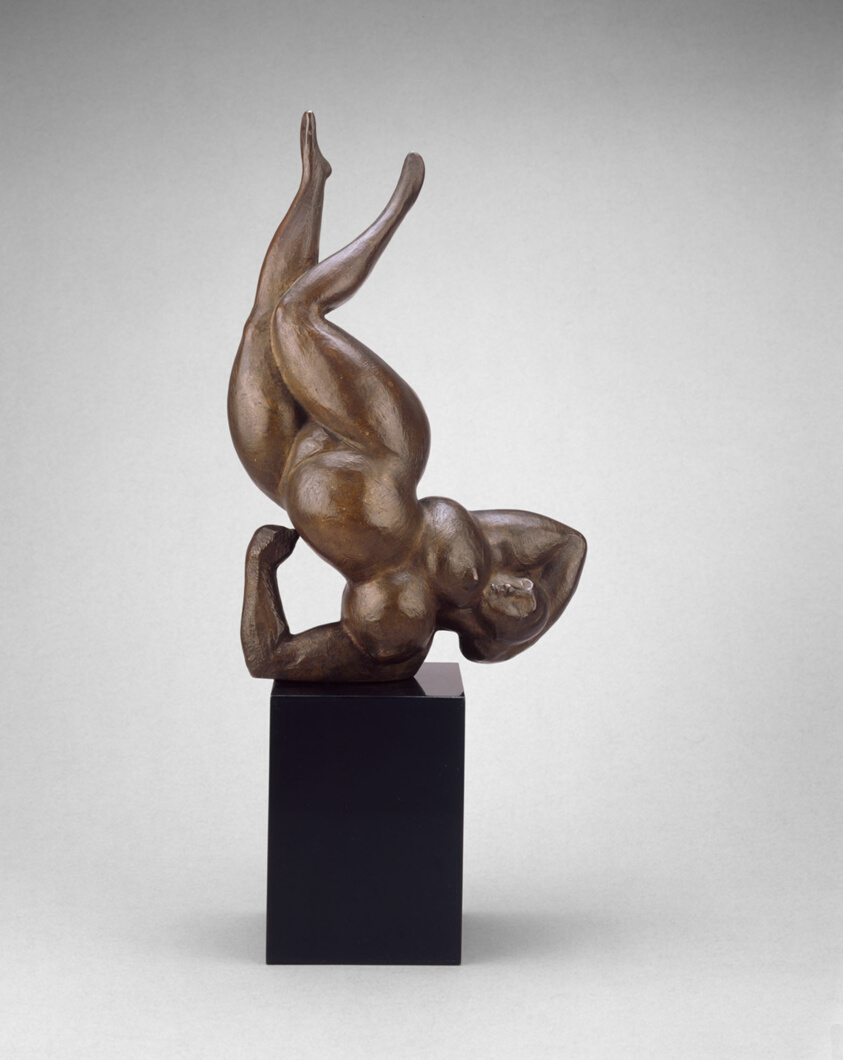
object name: Sculpture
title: "Acrobat" Upside Down Figure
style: Modernism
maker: Gaston Lachaise (American, born France, 1882–1935)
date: 1926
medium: Bronze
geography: United States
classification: bronze; metal; sculpture; modern and contemporary art